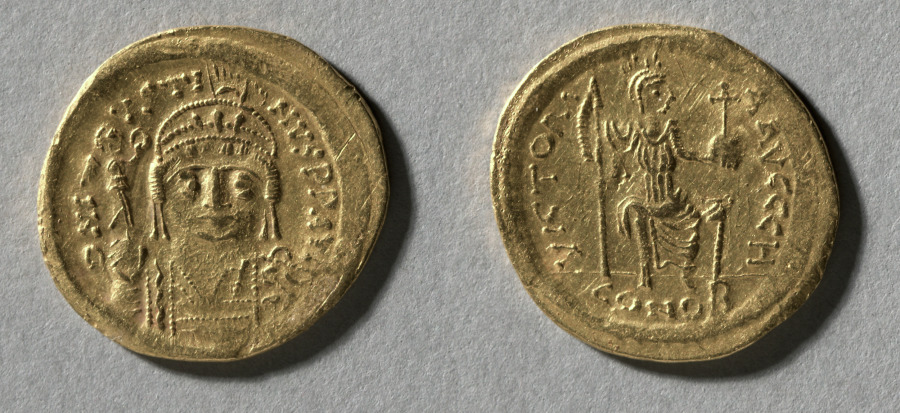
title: Solidus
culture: Byzantine, 6th century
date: 565–578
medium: gold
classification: Coins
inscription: (Avers): DNI VST NVSPPAVI (Revers): VICTORI AAVCCCH and CONOB